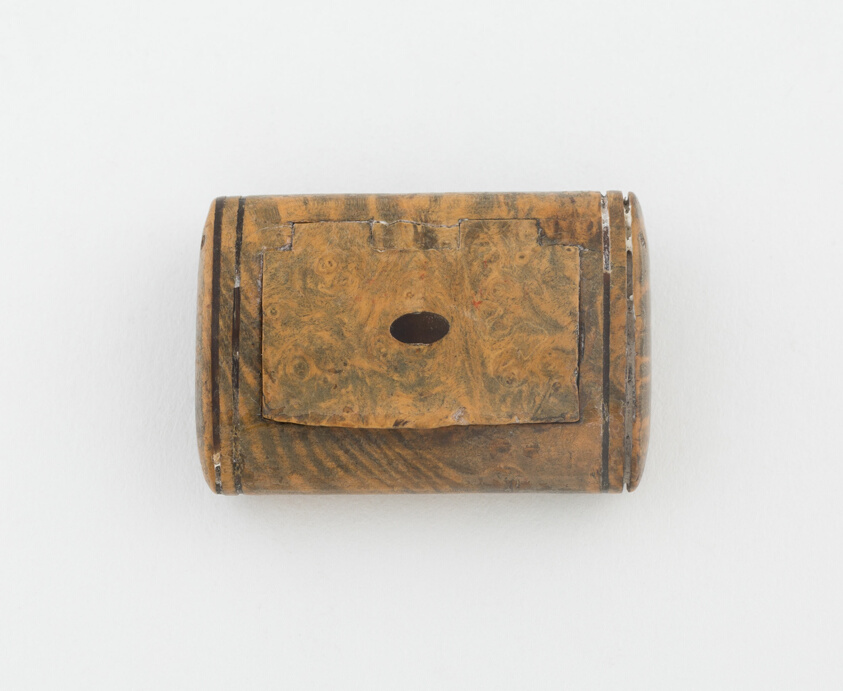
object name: Decorative Arts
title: Snuffbox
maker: Continental Europe, possibly Netherlands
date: c. 1840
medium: Burled wood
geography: Europe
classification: snuff box; container for personal use; box; european decorative arts; decorative object/ornament; decorative arts